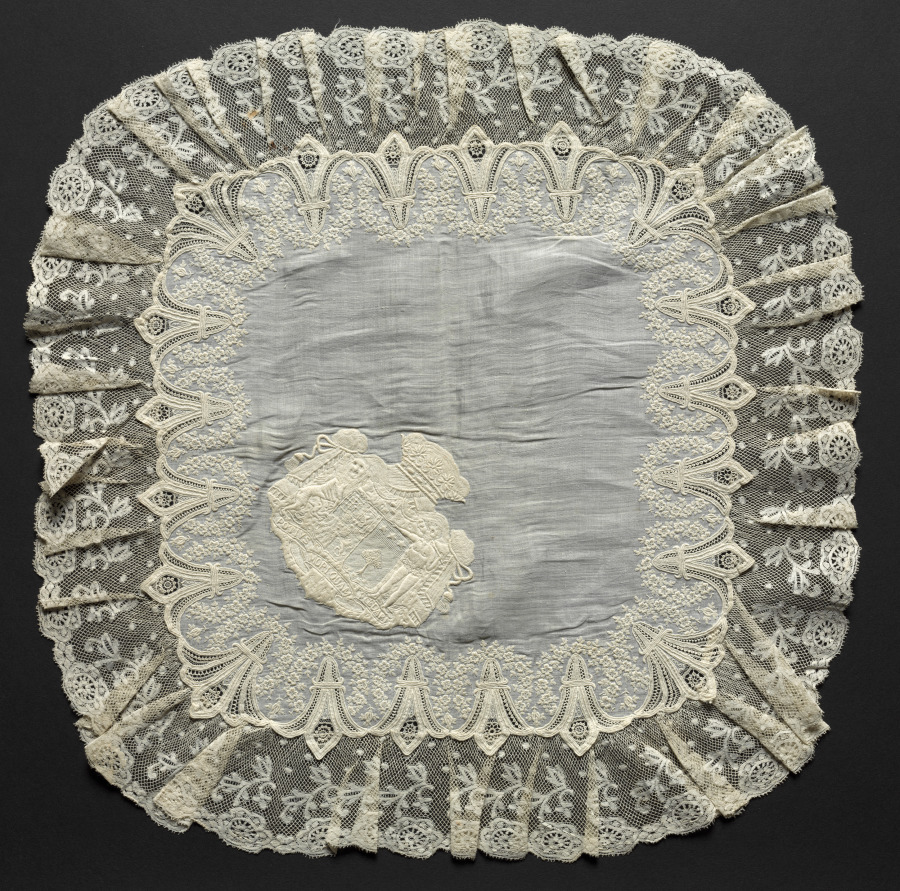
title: Lace Handkerchief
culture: Switzerland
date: 1850–99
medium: linen: embroidery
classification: Embroidery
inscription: large coat of arms with motto: "Potius monquam foedari."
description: In one corner, this handkerchief has a large coat of arms with the motto Potius monquam foedari (death before dishonor) embroidered on it.